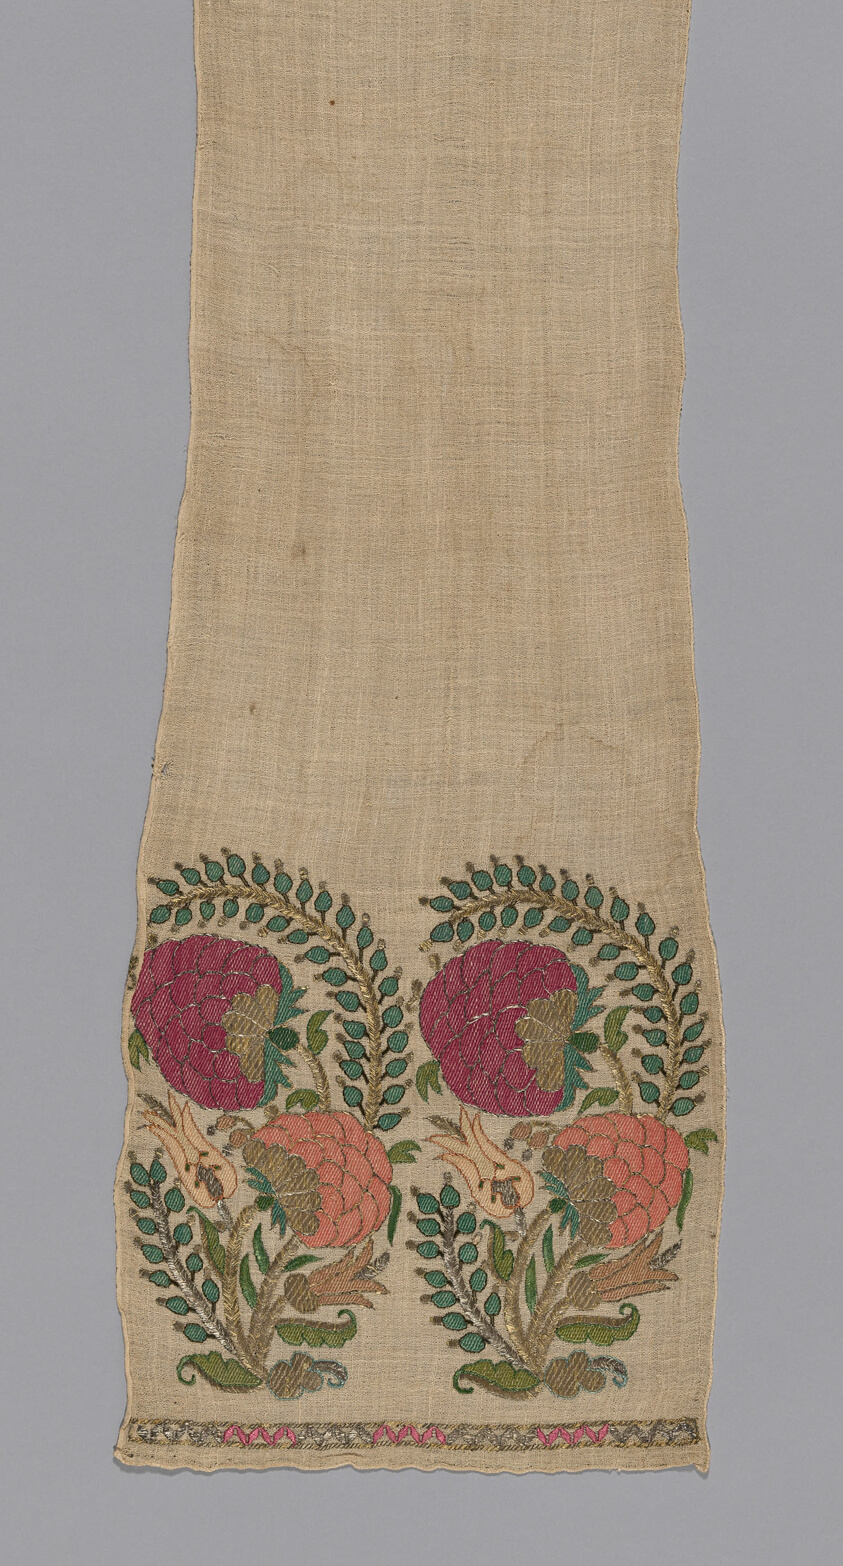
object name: Costume and Accessories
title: Sash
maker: Turkey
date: 1750/1800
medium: Sash, rose spray designs at ends.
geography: Turkey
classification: textile; weaving; needlework (visual works); costume